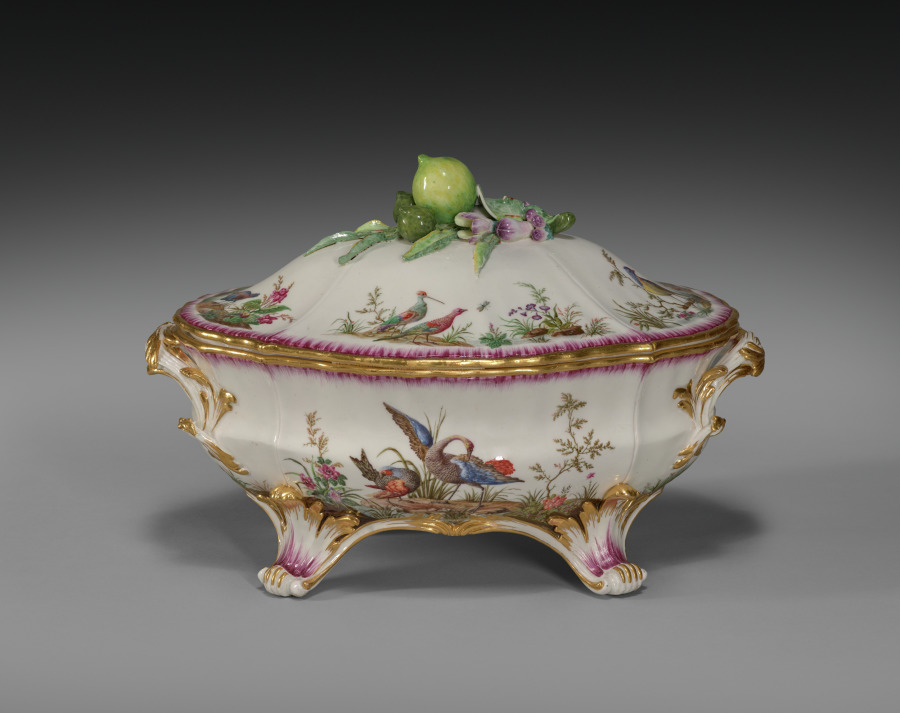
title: Covered Tureen (Terrine ancienne or Terrine ordinaire)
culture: France, Vincennes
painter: attributed to Louis-Denis Armand (French, active c. 1745–1783)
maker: Vincennes Porcelain Factory (France, 1740–56)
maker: probably by Jean-Claude Duplessis le Père (French, 1690–1774)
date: c. 1752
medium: soft-paste porcelain with enamel and gilt decoration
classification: Ceramic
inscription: [Interlaced foliate 'L's surmounted by a fleur-de-lys (indicating royal commision), in blue]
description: The intricately painted birds that decorate this tureen are the work of Louis-Denis Armand. Armand was known for his depictions of birds and landscapes, a specialty that may have come from his work as a painter of lacquered furniture with similar compositions. This tureen was likely designed by master goldsmith Jean-Claude Duplessis who began working as an artistic director at the Vincennes Porcelain Factory in 1748.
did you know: This object was manufactured in soft-paste porcelain, a material used by many European porcelain factories before they were able to emulate the hard-paste porcelain of China and Japan.